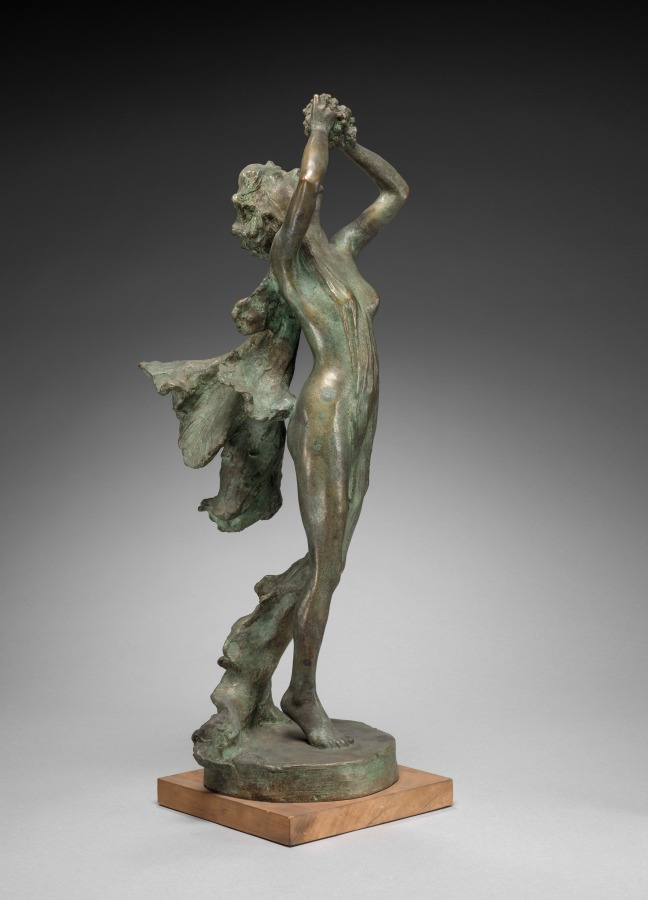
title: Fountain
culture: America, Ohio, Cleveland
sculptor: Jessica Wakem McMurray (American, born England, 1874–1950)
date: 1920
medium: bronze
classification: Sculpture